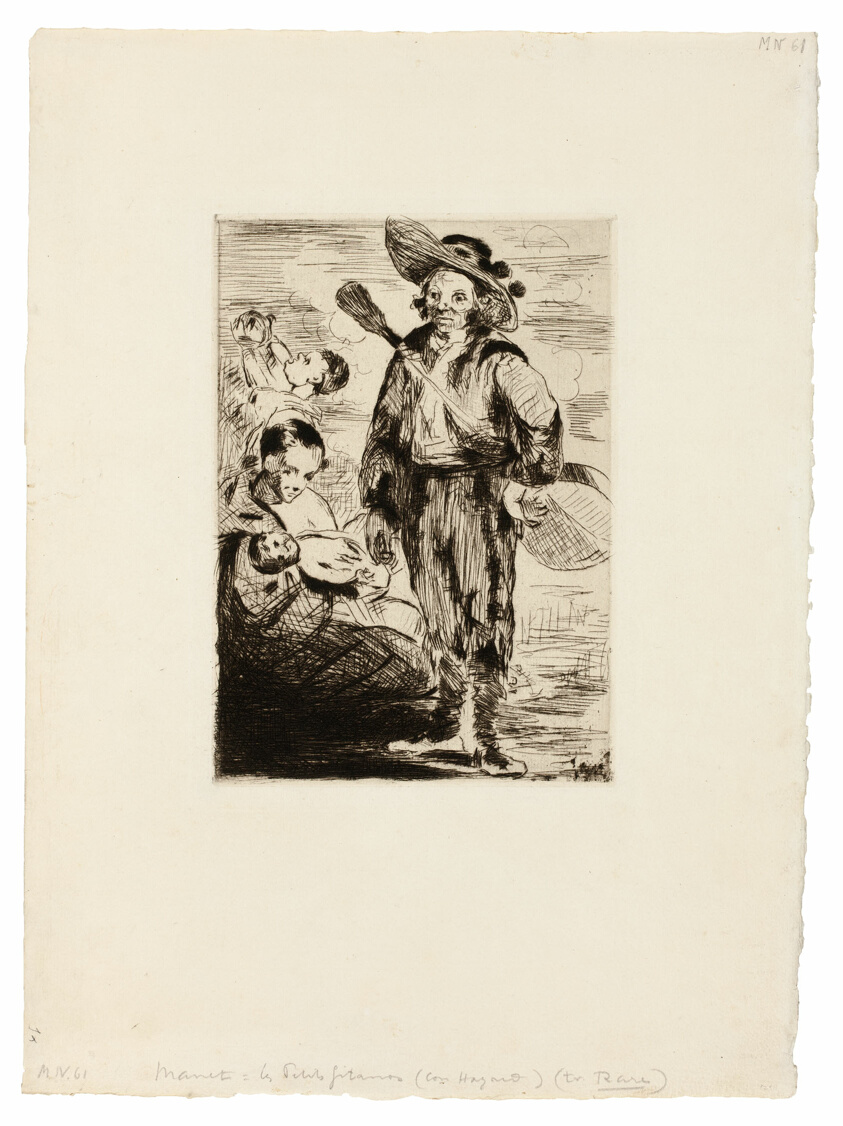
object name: Print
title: The Little Gypsies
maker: Édouard Manet (French, 1832-1883)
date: 1861/62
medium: Etching and drypoint in warm black on ivory laid paper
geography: France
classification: etching; print; prints and drawing